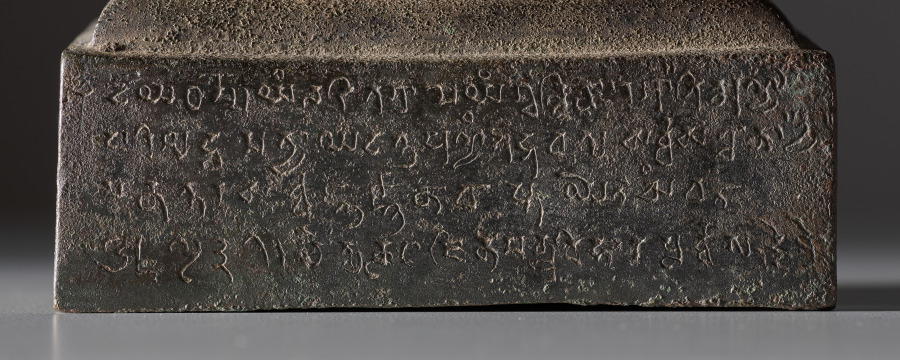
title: Standing Buddha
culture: Northern India, Uttar Pradesh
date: 591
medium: bronze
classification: Sculpture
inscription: 1. ṹ deyadharmmoyaṃ laḍitagrāme yaṃgvalvihāre śā[kya] bhikṣuṇyā 2. pariśuddhamatyā yadattra puṇyaṃ tadbhavatu sarvvasatvānā- 3. manuttarasarvva jñānāvāptaye/ / saṃvat 4a. 500 10 3/ / caityakūta jinabandhuvihārapūrvva-bhuddeśe 4b. piṇḍakena bhojanaṃ karttavya*/ / *Mistake for karttavyam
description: This bronze Buddha is exceptional, because it carries an inscription on its base that dates its manufacture to the year 591. According to the inscription, the sculpture was dedicated by a nun who was from a village in Nepal, but she probably commissioned it at a workshop in northern India. The Buddha's robe on this image has been left plain, without pleat lines to obscure the beauty of the contours of the body. Only the rippling scalloped clusters of the garment’s hem lend some sense of energy and subtle ornament to the composition.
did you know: Around the time when this sculpture was made, portable bronzes began to replace relics as the principal sacred commodity circulating in the Buddhist world.